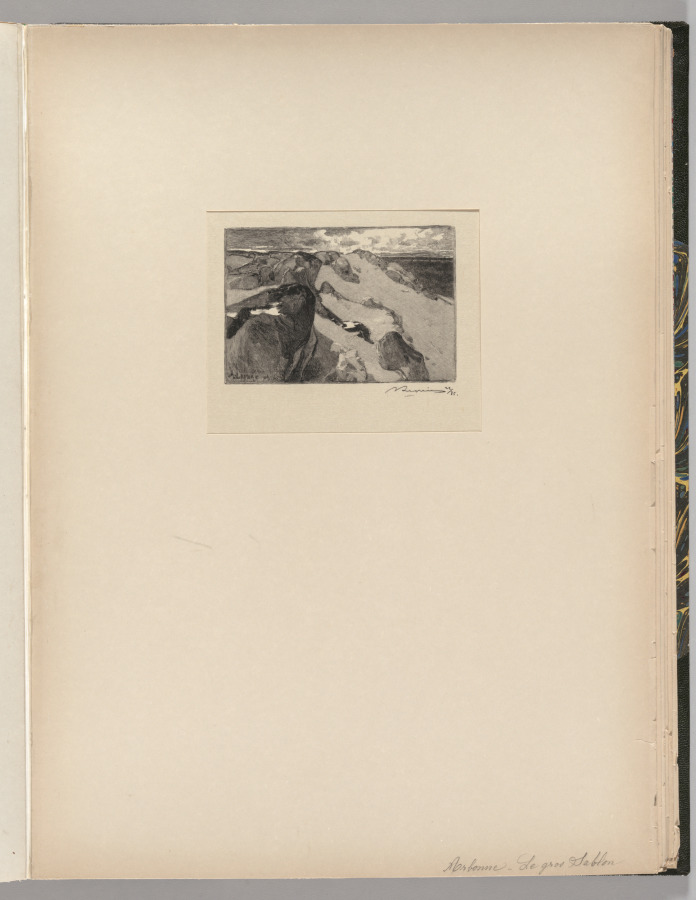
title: Arbonne, Le Gros Sablon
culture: France, 19th century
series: Fontainebleau Forest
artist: Auguste Louis Lepère (French, 1849–1918)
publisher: A. Desmoulins, Published in Revue Illustrée, 1887–90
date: 1890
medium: wood engraving from bound volume of 34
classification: Bound Volume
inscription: In block, lower left: A. LEPÈRE. Del. sc; below image, lower right, in black ink: ALepère 22/35; on window mat, lower right, in graphite:: Arbonne.-Le gros Sablon